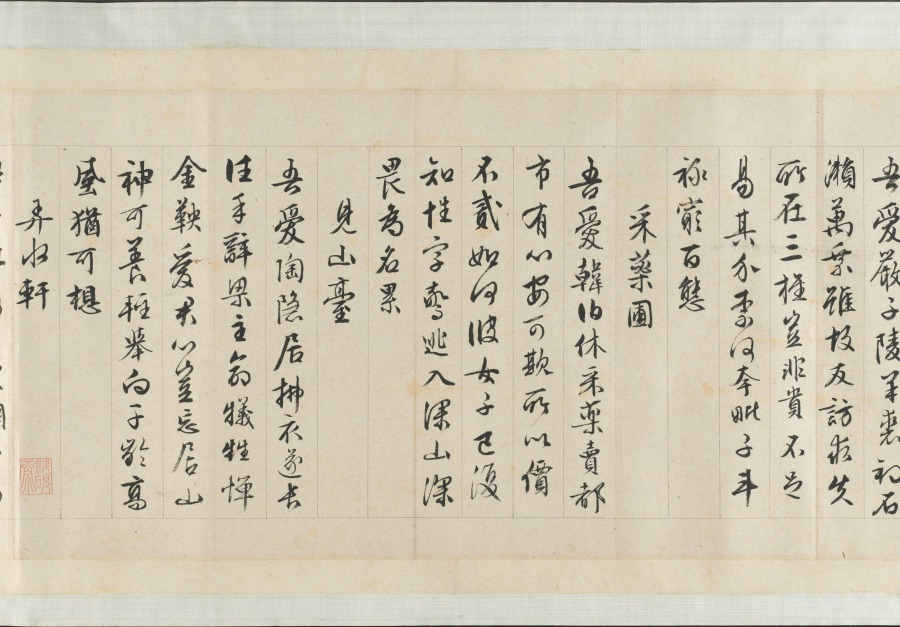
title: Garden for Solitary Enjoyment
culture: China, Ming dynasty (1368–1644)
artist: Qiu Ying (Chinese, 1494–1552)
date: 1515–52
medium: Handscroll; ink and light color on silk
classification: Painting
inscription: Accompanying text of an essay together with seven poems of Sima Guang (1019–1086) and one poem of Su Shi (1037–1101) written by Wen Zhengming (1470–1559) in 1558.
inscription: 2 colophons and 82 seals: 4 seals of Wen Zhengming 文徵明 (1470–1559); 59 seals of Xiang Yuanbian 項元汴 (1525–1590); 1 colophon, dated 1644, and 7 seals of Xiang Yukui 項禹揆 (c. late 1500s–1659); 1 colophon, dated 1880, and 2 seals of Weng Tonghe 翁同龢 (1830–1904); 2 seals of Ch'eng Chen-i (19th c.); 1 seal of Han Ch'ung (19th c.); 4 seals of Wan-go H. C. Weng 翁萬戈 (1918–2020); 3 seals unidentified.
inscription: Colophon by Xiang Yukui 項禹揆 (c. late 1500s–1659): The painting of The Garden for Self-enjoyment on the right by Shih-chou, Mr. Qiu [Qiu Ying] is in the style of Li Lung-mien. Its mood is peaceful, as if meeting the ancient gentlemen face to face among the brushes and silk; it lifts one above the sordid bustle of life. Formerly, my late father handed me this scroll which had only the painting without the written essay. I considered asking a good calligrapher to write the essay to add to it but was afraid that the quality of the writing would not match the painting. Several years later, I saw at a friend's house this essay and poems (of Ssu-ma Kuang] written by Hengshan [Wen Zhengming], once owned by my grandfather; so I spared no expense to obtain it. I rejoiced at this and said: "The divine swords are finally united. How things are pre-destined!" Now my friend Chang Kung-chao's technique for mounting [painting and calligraphy] is excellent. Therefore by daring to take them out and join them together, I can preserve this beautiful story of singular reunion. Xiang Yukui recorded at Hai-yeh-t'ang [hall] two days before New Year's Eve in the jiasheng year of the Chongzhen era [1644]. trans. LYSL/HK/WKH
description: Garden of Solitary Enjoyment refers to a site built in 1073 by the statesman Sima Guang (1019–1086) after he had retired to Luoyang, Henan province. Every spring, visitors would flock to his garden. Each of its seven structures references a historic figure. Sima wrote: I channel streams [like Du Mu], to water flowers [like Bai Juyi], or trim bamboo [like Wang Huizhi]. . . . I know of no joy between heaven and earth that could take its place. Qiu Ying’s painting, created after an 11th-century version of the same theme, must have appealed to garden owners of the Ming dynasty, since it became the template for numerous Suzhou workshop copies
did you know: Sima Guang completed his monumental survey of Chinese history, Zizhi tongjian, in the garden depicted in this painting.